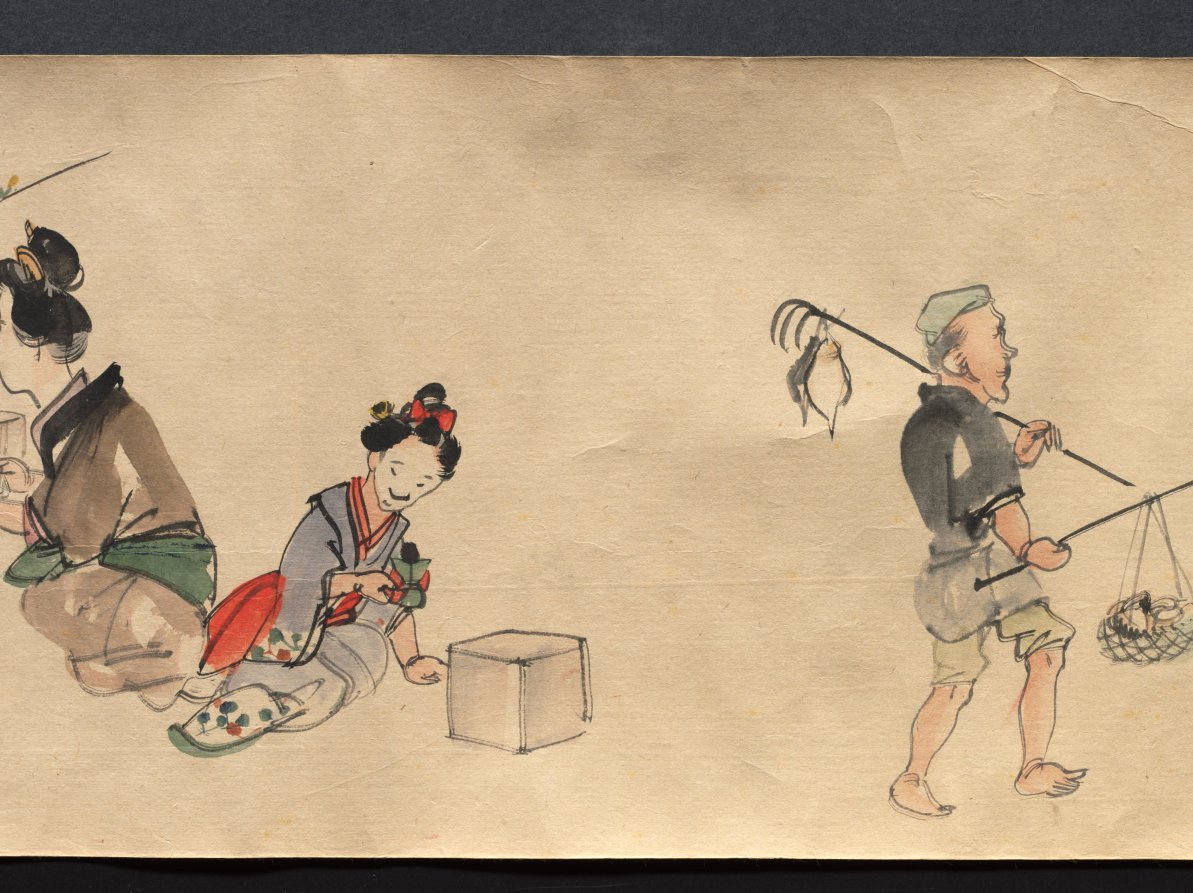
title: Festival Scenes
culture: Japan, Edo period (1615–1868)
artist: Suzuki Nanrei (Japanese, 1775–1844)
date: c. 1795–1844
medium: handscroll; ink and color on paper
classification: Painting